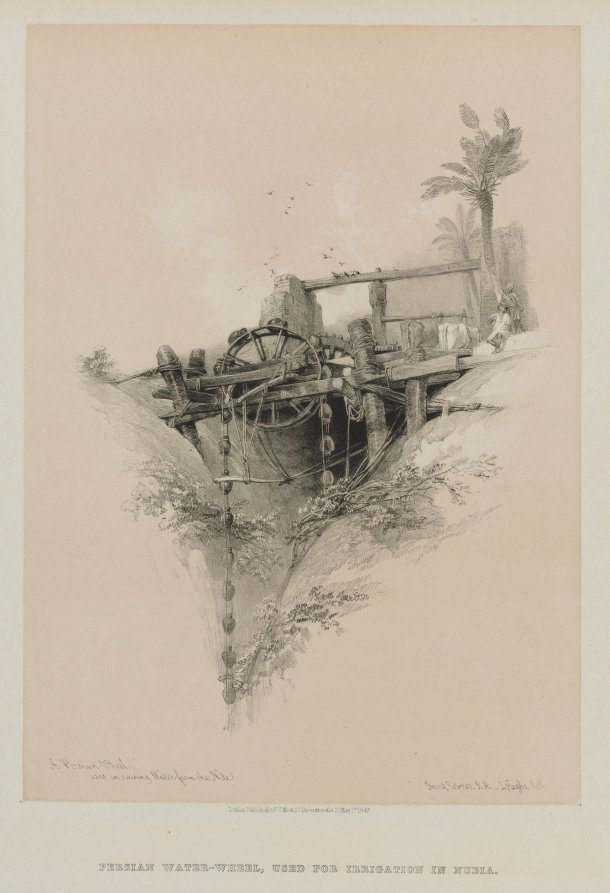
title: Egypt and Nubia, Volume II: A Persian Wheel, Used in Raising Water from the Nile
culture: England, 19th century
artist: Louis Haghe (British, 1806–1885)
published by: F. G. Moon, 20 Threadneedle Street, London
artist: after David Roberts (Scottish, 1796–1864)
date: 1847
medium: color lithograph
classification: Print